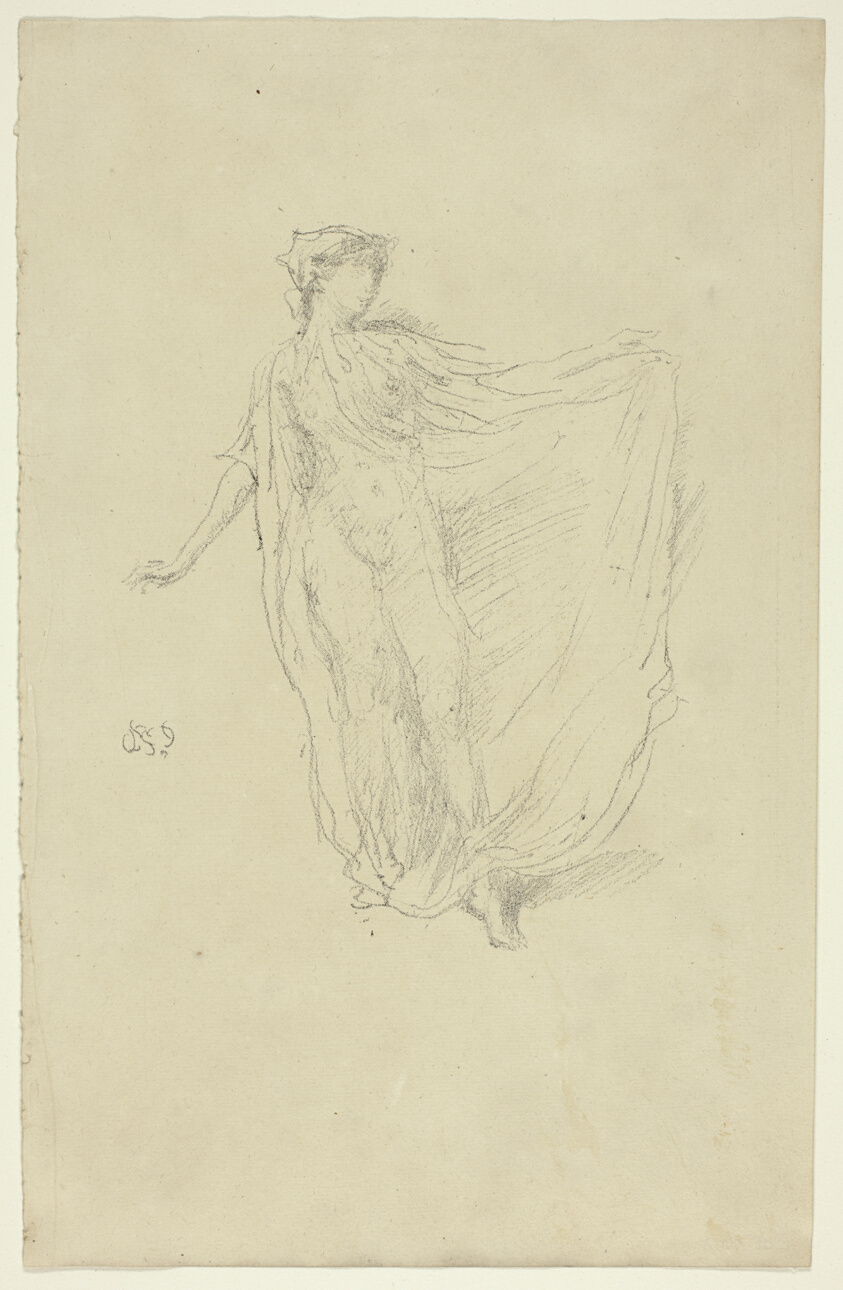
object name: Print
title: The Dancing Girl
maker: James McNeill Whistler (American, 1834-1903)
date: 1889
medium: Transfer lithograph in black on tan laid paper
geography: United States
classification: transfer lithograph; lithograph; print; prints and drawing; paper